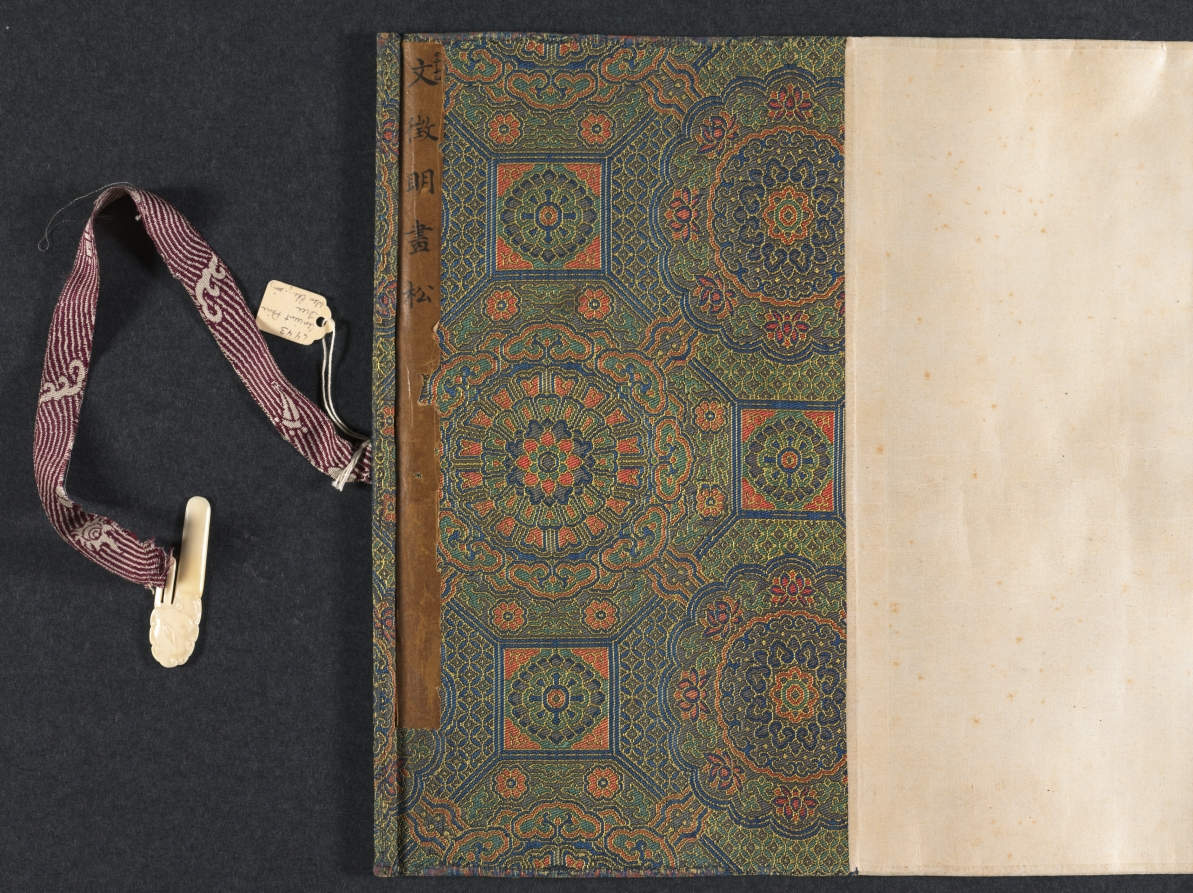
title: Old Pine Tree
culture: China, Ming dynasty (1368–1644)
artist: Wen Zhengming (Chinese, 1470–1559)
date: late 1530s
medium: handscroll; ink on paper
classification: Painting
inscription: 變化勢難縛，虬髯似戟森. 徵明 [印]文徵明印; 衡山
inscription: 2 partial seals of Qian Shisheng 錢士昇 (1575–1652)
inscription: 8 imperial seals: 6 of the Qianlong emperor (r. 1736–95); 1 of the Jiaqing emperor (r. 1796–1821); 1 of the Xuantong emperor (r. 1909–11).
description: Here the natural appearance of a gnarled and vine-entangled pine has been transformed into a rhythmic abstraction of brushstrokes and ink tonalities, with unifying opposites—opening and closing, rising and falling—that provide the design across the horizontal scroll. The artist's inscription reads: "The force of change beyond restraint; / The dragon's whiskers are likened to a forest of spears."